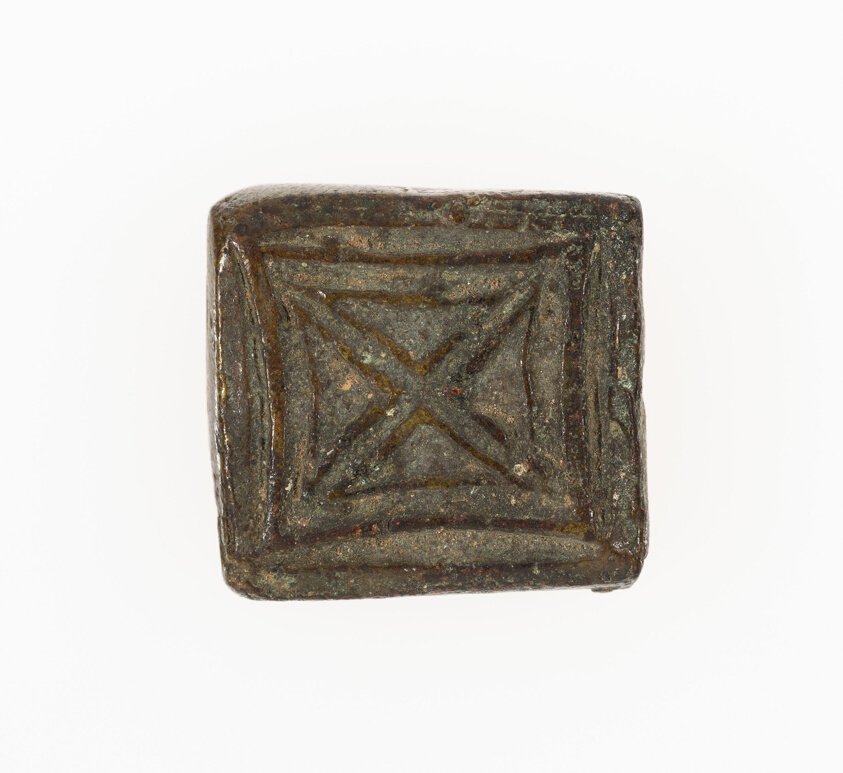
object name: Decorative Arts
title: Goldweight with a Geometric Design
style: asante, Arts of Africa, akan, african Art, Coastal West Africa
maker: Asante or related Akan-speaking peoples; Ghana; Coastal West Africa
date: 18th/19th century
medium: Copper alloy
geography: Ghana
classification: gold-weight; metal; arts of Africa; measure; african art; decorative arts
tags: geometric motif